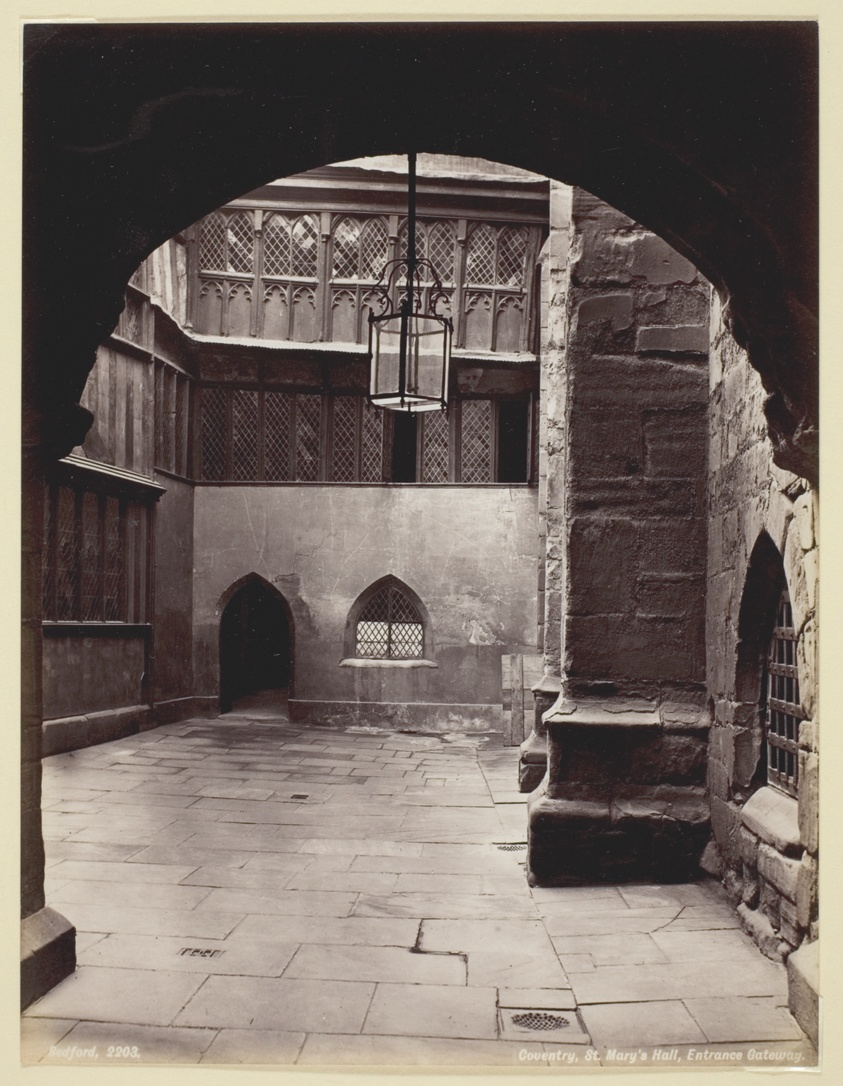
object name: Photograph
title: Coventry, St. Mary's Hall, Entrance Gateway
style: 19th century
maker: Francis Bedford (English, 1816–1894)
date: 1860/94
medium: Albumen print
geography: England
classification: albumen silver print; photographic process; photography; photograph